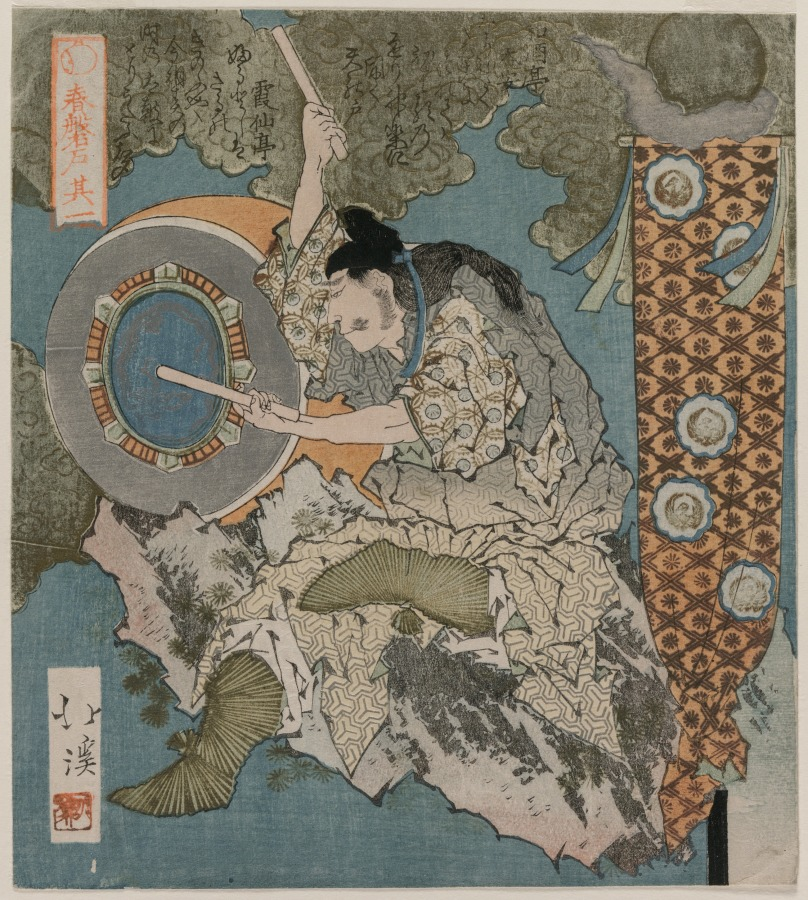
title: Drummer from The Cave Door of Spring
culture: Japan, Edo period (1615–1868)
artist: Totoya Hokkei (Japanese, 1780–1850)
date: 1825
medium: first from a pentaptych of woodblock prints; ink and color on paper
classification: Print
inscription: Signature: Hokkei Seal: Hokkei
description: These elegant surimono prints come from a set of five images inspired by the legend of the Shinto Supreme Sun Goddess, Amaterasu. She was once so offended by her brother that she retreated into a cave, leaving the earth in darkness. Several attempts to lure her out with cocks crowing, music making, and a goddess dancing failed, but a mirror hung from a nearby tree made Amaterasu curious, bringing her to the entrance of the cave. A stone was quickly placed at the entrance to block her way back into the cave, and light was restored to the world. Each print is set against a blue evening sky with embossed clouds enriched with gold, silver, and copper.